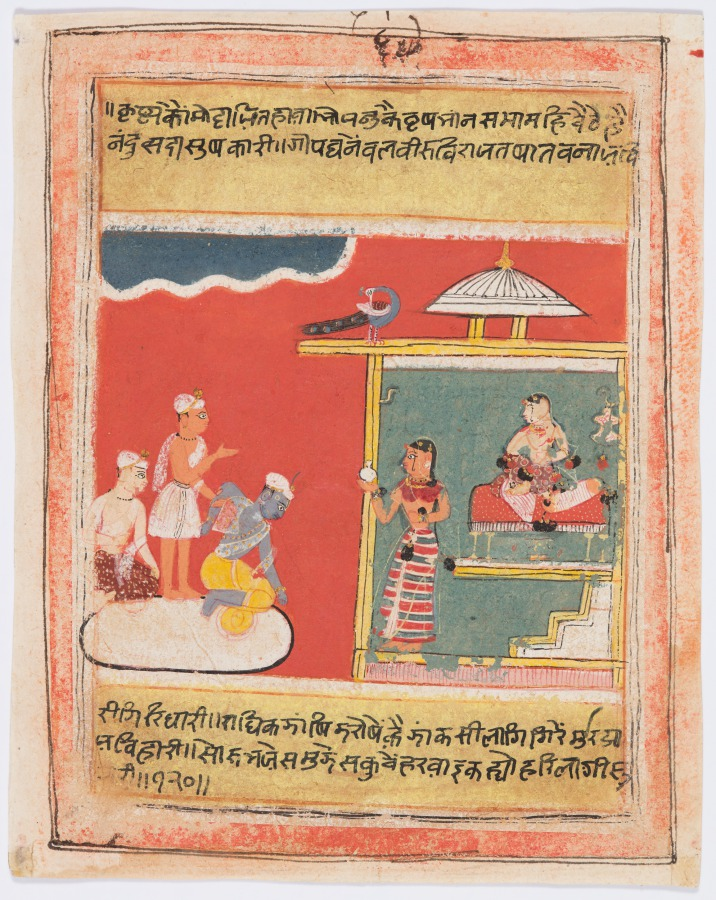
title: Krishna and Radha Avoid Embarrassment: Mottaita Bhava, from a Rasikapriya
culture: Central India, Madhya Pradesh, Malwa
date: c. 1640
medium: Gum tempera and gold on paper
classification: Painting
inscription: (front page) atha moṭṭayita hāva. helā līlā kari jahaṅ prakaṭata sātvika bhāva budhivala rokata sobhijai kahi moṭṭayita hāva. 16. rādhikā kauṅ moṭṭayita hava. khelata he hari bāge bane jahāṅ baiṭhī priyā rati teṅ ati lonī. kesava kaisahuṅ pīṭhi meṅ diṭhi parī kuca kuṁkuma kī ruci ronī. māta samīpa durāi bhale tini sātuka bhāvani kī gati honī. dhūri kapūra kī pūri bilocana sūṁghi sarorūha oḍhi uḍhani.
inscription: (back page) kṛṣna kauṁ moṭṭayita hāva. bhojan kai vṛṣbhānu sabhā mahaṁ baiṭhe he naṁda sadā sukhakārī. gopa ghane bala bīra birājata khāta banāi birī giridhārī. rādhikā jhaṁkī jharokhe hvai jhaṁpa sī lagī gire murjhāi bihārī. sora bhayo samujhe sakuche haruvāi kahyo hari lāgī supārī. 120.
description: The double-sided leaf is based on the theme of embarrassing situations avoided by trickery. Both sides are presented with the same composition and color palette, indicating the unity of emotion felt by the hero and the heroine. The paintings in concert with the verses explore a complex emotion experienced by lovers, its causes, and how it causes the lovers to react.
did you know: Double-sided leaves are rare among painted Rasikapriya sets.